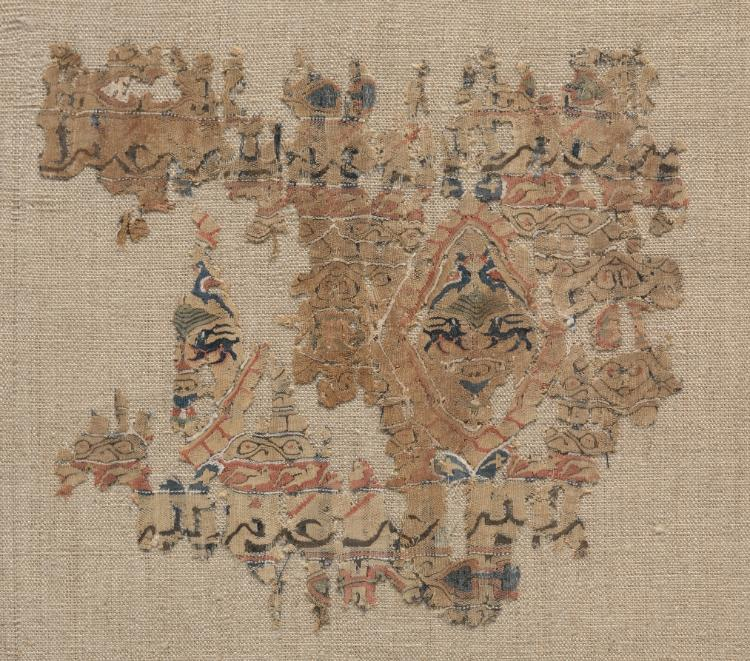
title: Fragment of a Tiraz-Style Textile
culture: Egypt, Fatimid period, 12th century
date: 1100s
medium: tapestry (probably originally inwoven in tabby ground); linen and silk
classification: Textile